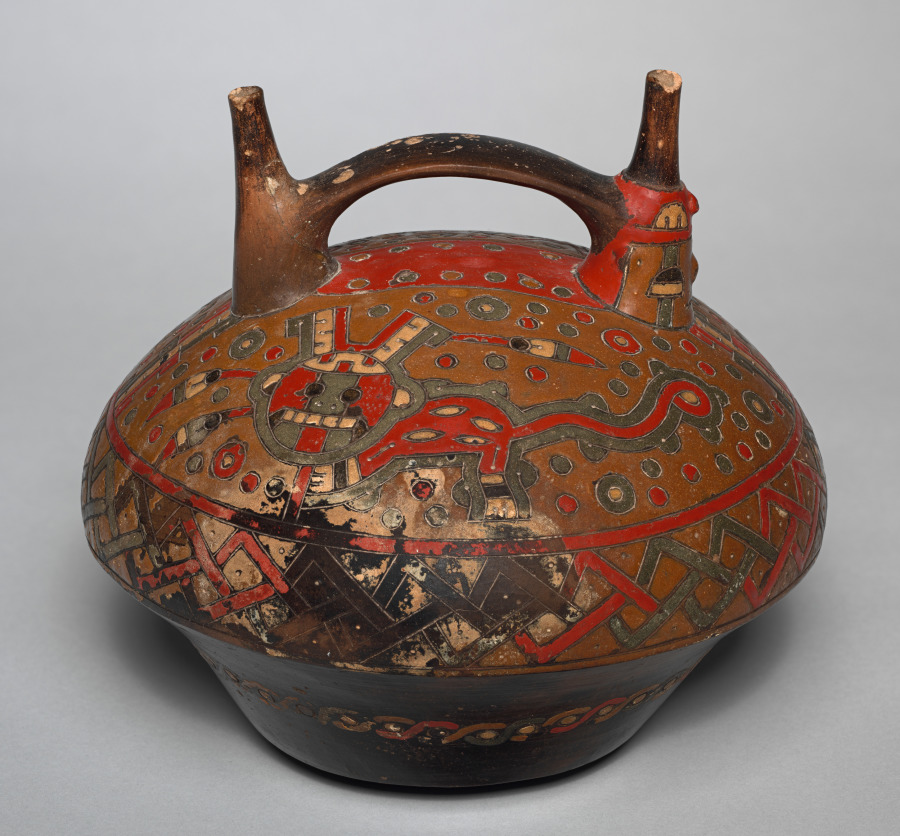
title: Double-spouted Vessel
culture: Andes, south coast, Paracas people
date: 750–1 BCE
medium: Ceramic, resin-based paint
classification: Ceramic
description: The Paracas style, the earliest of Peru’s south coast, focuses on geometric abstraction and polychromy, the latter achieved in ceramics with resin-based paints applied after the vessel was fired. This example is embellished with two monkey- or feline-like creatures whose curvilinearity indicates the vessel was made in the late stages of the Paracas sequence.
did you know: A face with upturned eyes on one spout gives this vessel a specific orientation.